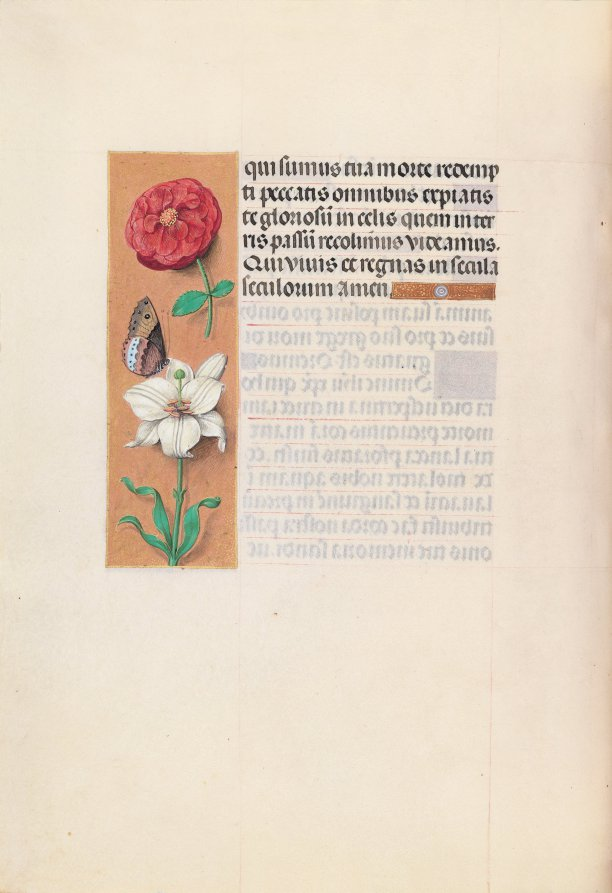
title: Hours of Queen Isabella the Catholic, Queen of Spain: Fol. 76v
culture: Flanders, Ghent and Bruges, late 15th century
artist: Master of the First Prayerbook of Maximillian (Flemish, c. 1444–1519)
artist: and Associates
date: c. 1500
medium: ink, tempera, and gold on vellum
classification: Bound Volume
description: This manuscript was illuminated by a circle of at least five highly organized manuscript painters active in the Flemish cities of Ghent and Bruges. The principal illuminator was Alexander Bening, who painted the majority of the book's miniatures. Manuscripts produced by this circle of artists are renowned for the decoration of their borders, which typically feature a rich variety of realistically-painted flowers, birds, and butterflies. This prayer book, called a book of hours, was intended not for a cleric, but for the private devotions of a lay person-in this case, Isabella the Catholic, Queen of Spain (1451-1504). Isabella's coat of arms embellishes the book's frontispiece. It is unlikely that the book was commissioned by the Queen herself; rather, she probably received it as a diplomatic gift from someone courting her patronage, perhaps Cardinal Francisco Jimenez de Cisneros. A Franciscan friar, Jimenez was dependent upon Isabella for his advancement, first to the post of Queen's confessor in 1492, and then to Archbishop of Toledo in 1495.